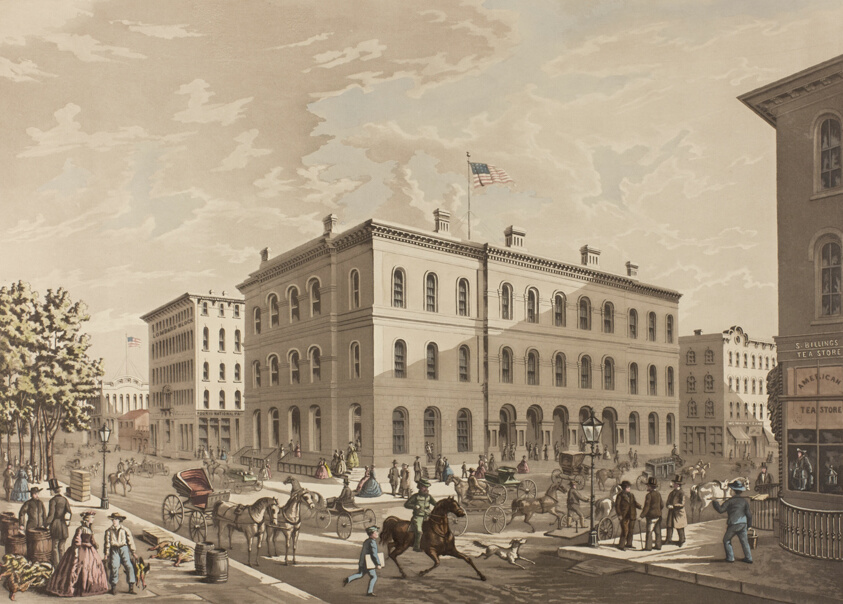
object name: Print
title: N.W. Corner of Dearborn and Monroe Streets, Chicago, Showing the Post Office Building in the Year 1865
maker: Raoul Varin (French, 1865-1943)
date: published August 1927 (1865 depicted)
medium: Aquatint and etching in brown, with hand-coloring, on cream wove paper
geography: France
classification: aquatint; print; prints and drawing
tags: Chicago